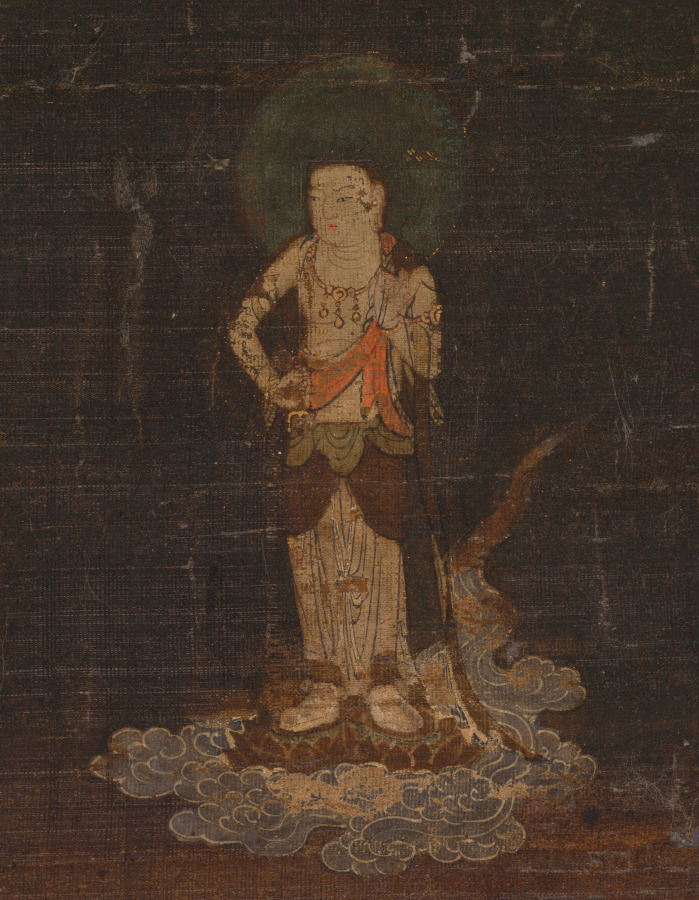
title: Kasuga Shrine Mandala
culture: Japan, Kamakura period (1185–1333)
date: early 1300s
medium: Hanging scroll; ink, color, and gold on silk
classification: Painting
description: A golden path beginning at the bottom of this painting leads up to four red-and-white buildings to the left, then to a fifth building on the right. These are the five shrine halls of Kasuga Taisha in Nara. Above and beyond the buildings is a sacred mountain range––with Mount Mikasa at center, Mount Wakakusa in gold to the left, and the sun or moon rising up behind the mountains. Sacred deer appear here and there. Five figures representing the original Buddhist forms of the five kami of the shrine complex stand on clouds above the mountains.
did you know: Sacred deer, the vehicles of the Kasuga deities, move about the shrine compound.